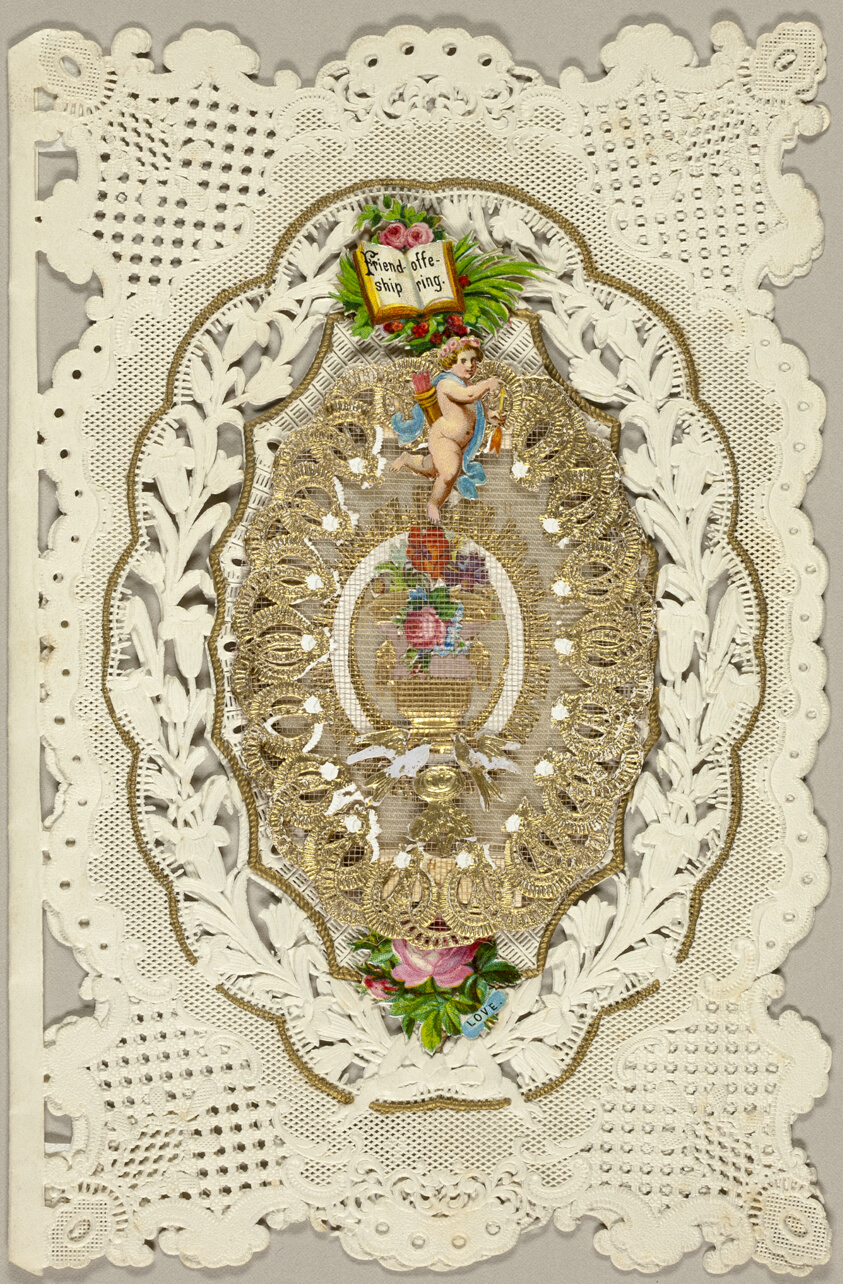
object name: Drawing and Watercolor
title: Friendship Offering (valentine)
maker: Unknown Artist; American or English, 19th century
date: c. 1850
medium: Collaged elements on cut and embossed ivory wove paper (lace)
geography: United States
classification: valentine; prints and drawing; paper